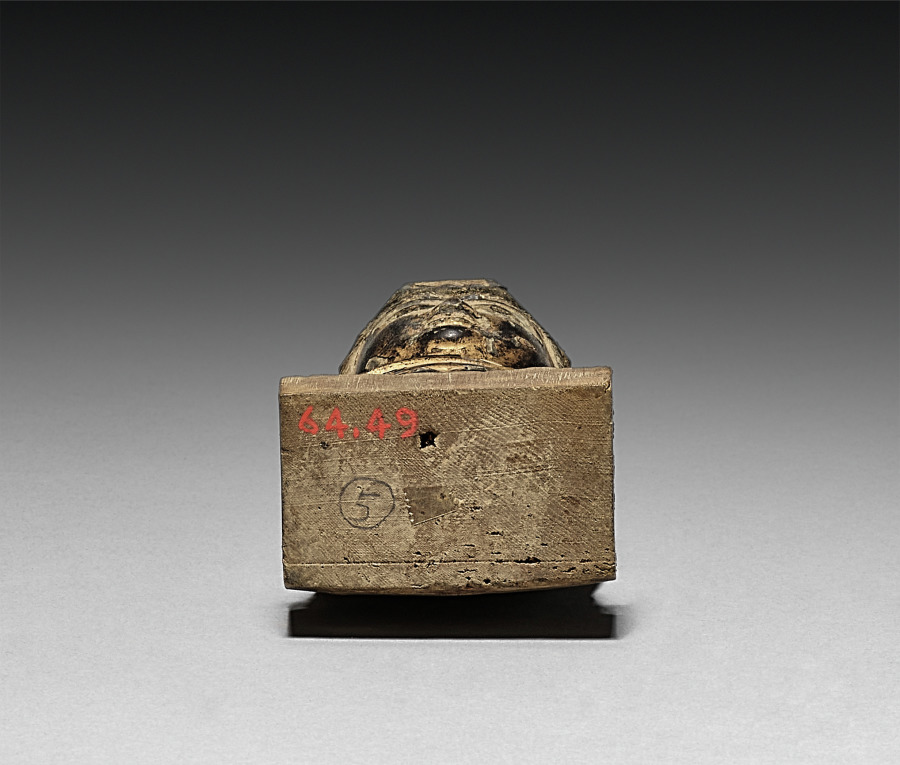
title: Bodhisattva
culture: Japan, Heian period (794–1185)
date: 900s-1100s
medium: gilded wood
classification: Sculpture